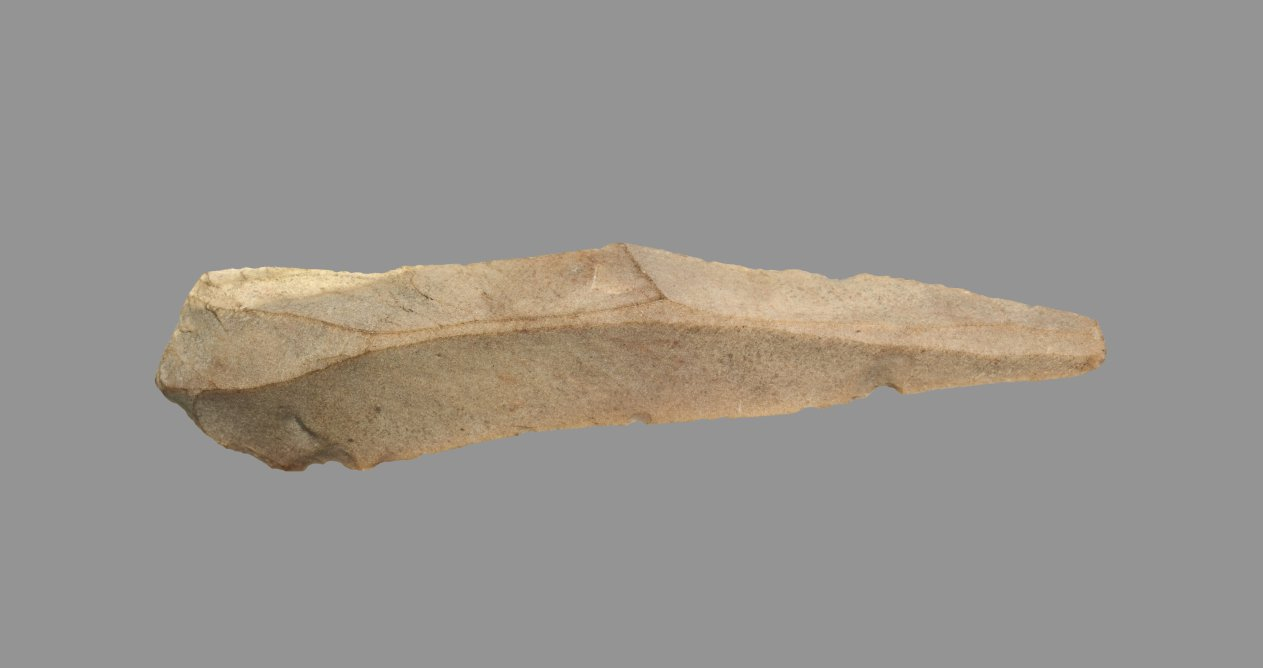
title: Sickle Blade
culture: Egypt, Middle Kingdom (2040–1648 BCE), Dynasty 12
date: 1980–1801 BCE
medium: flint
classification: Implements